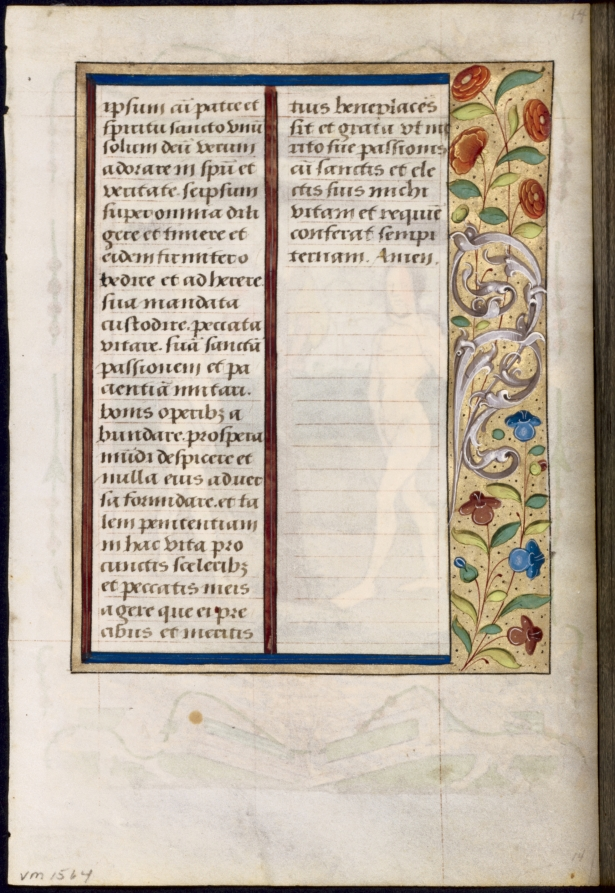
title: Leaf from a Book of Hours: Text with Illustrated Border (verso)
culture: France, Rouen, 16th century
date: c. 1510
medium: ink, tempera and liquid gold on vellum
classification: Manuscript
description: This leaf came from a highly customized and lavish book of hours made in Rouen, a major center for book production. Intended for a female patron, the original book, to which the museum owns three leaves, contained numerous illuminations and marginalia. The book was whole until the 1980s, when it was dismembered and the leaves sold separately. Other leaves from the same book are now in the Walters Art Museum in Baltimore, Maryland, and the Bodleian Library in Oxford, England. This leaf precedes the opening of the Hours of the Virgin and the traditional first scene of the Annunciation.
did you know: The heart of every book of hours is the Hours of the Virgin, a set of prayers in which the reader asked the Virgin Mary to intercede on their behalf.